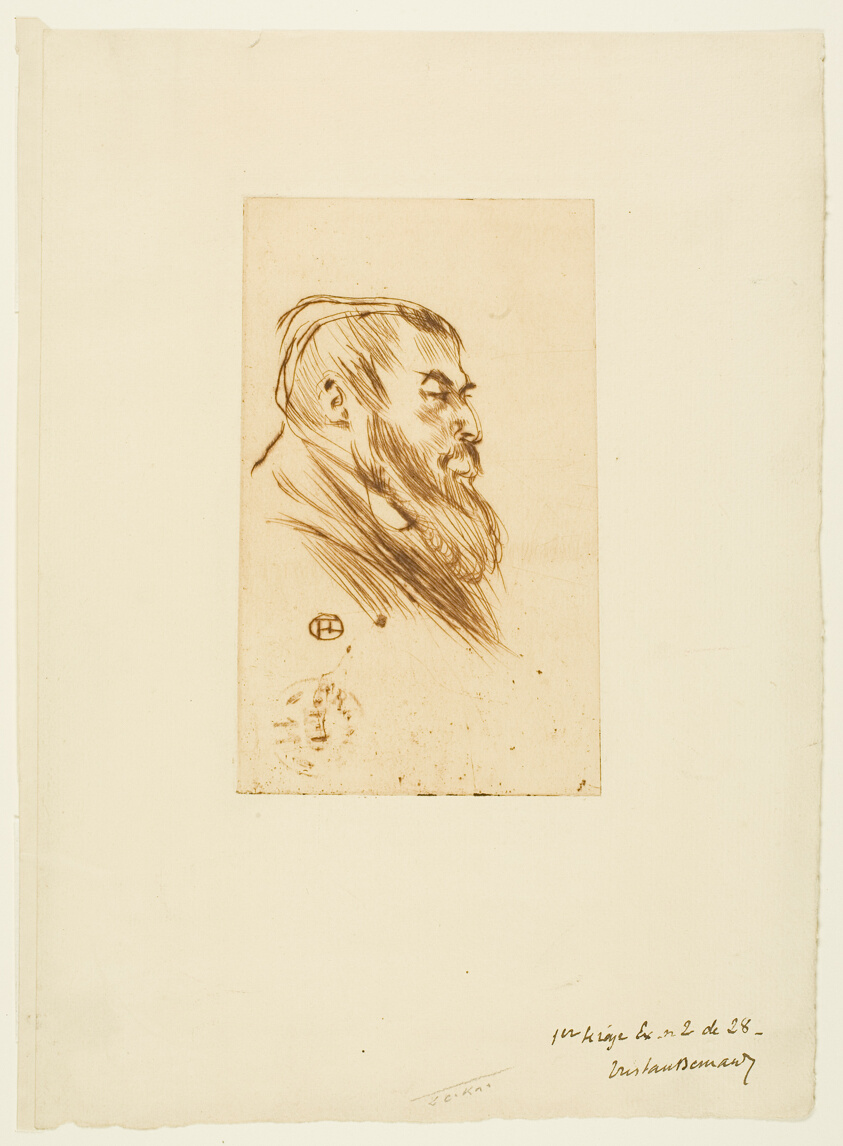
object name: Print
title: Tristan Bernard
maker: Henri de Toulouse-Lautrec (French, 1864-1901)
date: 1898, printed and published 1920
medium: Drypoint from a zinc plate in dark brown on cream laid paper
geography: France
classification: drypoint; print; prints and drawing